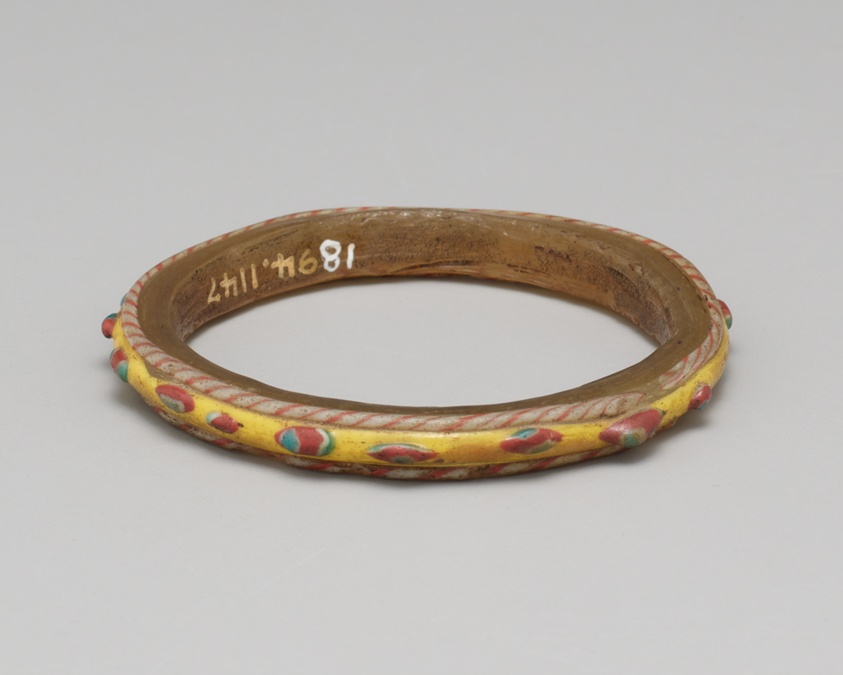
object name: Costume and Accessories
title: Bracelet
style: Islamic (culture or style)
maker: Islamic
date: 14th-15th century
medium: Glass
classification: glass; jewelry; ancient art; costume